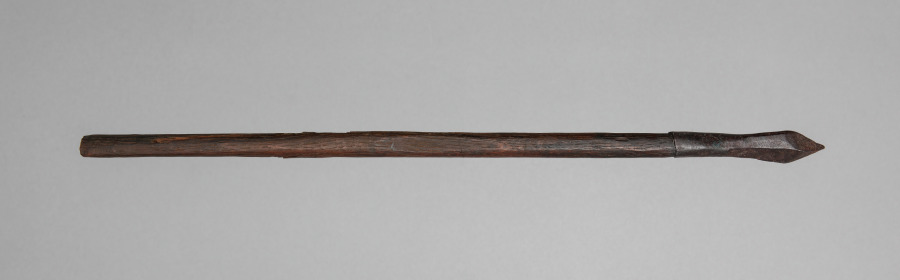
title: Crossbow Bolt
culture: Germany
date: 1500s-1600s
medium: wood, leather, steel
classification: Arms and Armor